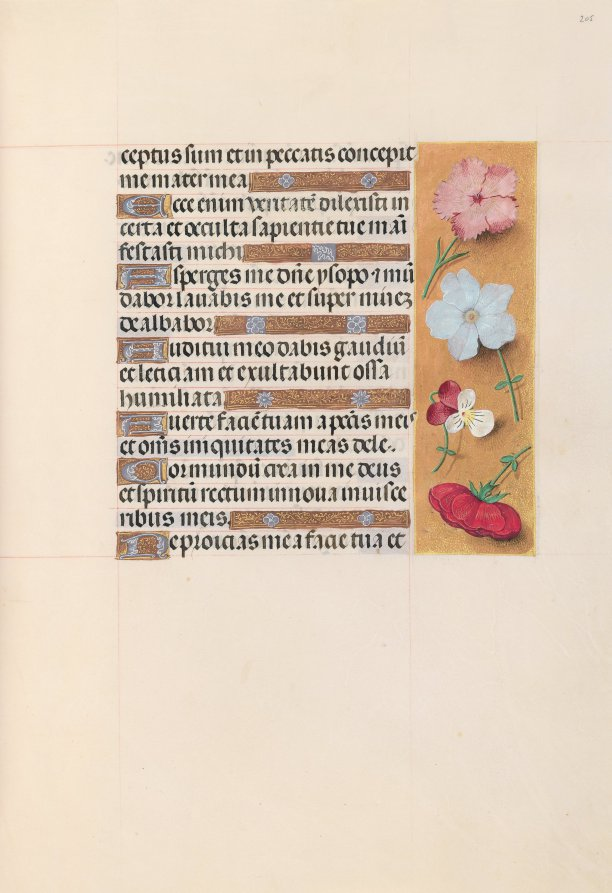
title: Hours of Queen Isabella the Catholic, Queen of Spain: Fol. 205r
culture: Flanders, Ghent and Bruges, late 15th century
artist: Master of the First Prayerbook of Maximillian (Flemish, c. 1444–1519)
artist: and Associates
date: c. 1500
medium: ink, tempera, and gold on vellum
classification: Bound Volume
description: This manuscript was illuminated by a circle of at least five highly organized manuscript painters active in the Flemish cities of Ghent and Bruges. The principal illuminator was Alexander Bening, who painted the majority of the book's miniatures. Manuscripts produced by this circle of artists are renowned for the decoration of their borders, which typically feature a rich variety of realistically-painted flowers, birds, and butterflies. This prayer book, called a book of hours, was intended not for a cleric, but for the private devotions of a lay person-in this case, Isabella the Catholic, Queen of Spain (1451-1504). Isabella's coat of arms embellishes the book's frontispiece. It is unlikely that the book was commissioned by the Queen herself; rather, she probably received it as a diplomatic gift from someone courting her patronage, perhaps Cardinal Francisco Jimenez de Cisneros. A Franciscan friar, Jimenez was dependent upon Isabella for his advancement, first to the post of Queen's confessor in 1492, and then to Archbishop of Toledo in 1495.